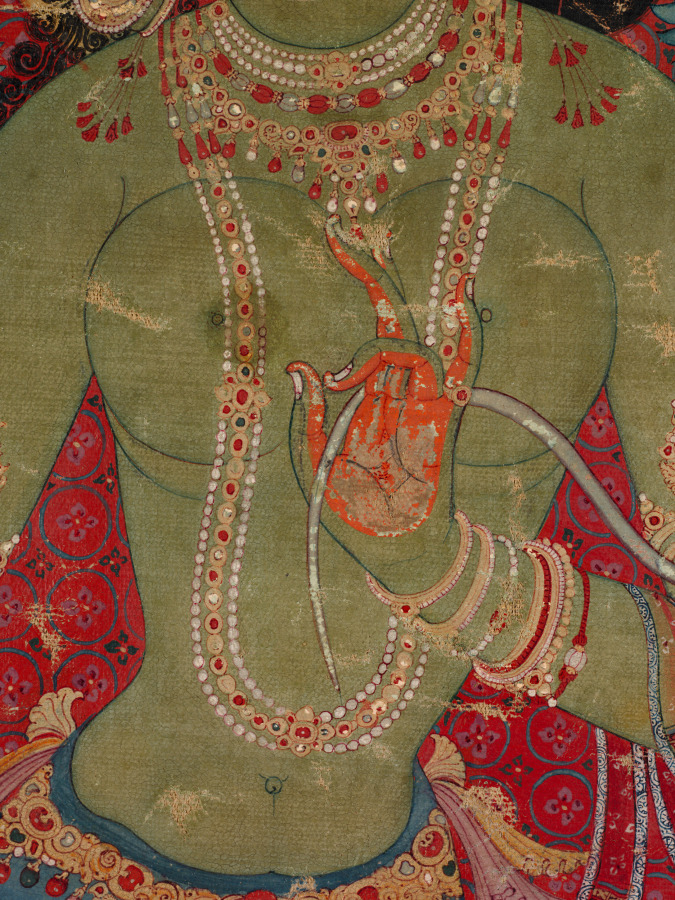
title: Green Tara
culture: Central Tibet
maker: attributed to Aniko (Nepalese, active in Tibet mid- to late 1200s)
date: c. 1260s; mounted, 2020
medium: thangka; gum tempera, ink, and gold on sized cotton; mount: silk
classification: Painting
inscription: Om Ah Hum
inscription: om tare tutare ture svaha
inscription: Om Ah Hum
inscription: Om Ah Hum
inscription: om ah sarva vyida svaha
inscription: ye dharmā hetuprabhavā he- tuṃ teṣāṃ tathāgato hy avadat teṣāṃ ca yo nirodha evaṃvādī mahāśramaṇaḥ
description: For Tibetans, Green Tara is one of the preeminent figures of their Buddhist faith, a radiant savioress who embodies the female form of the perfect, enlightened mind. The Green Tara in the Cleveland thangka—a Tibetan devotional painting on cloth—specifically dispels fear and provides protection, just like her mantra inscribed on the back side of the painting. Her green color and fear-not gesture link her to the cosmic Buddha of the North, enshrined above her head. Most scholars agree that this work was painted by the celebrated Nepalese artist known as Aniko.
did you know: The tiny monastic figure under Green Tara's right hand commissioned the painting.